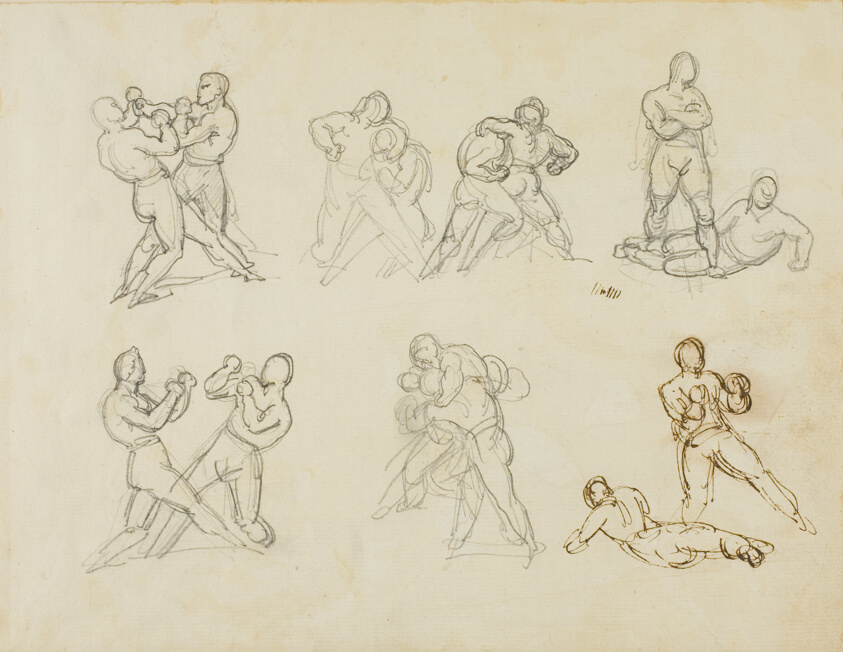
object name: Drawing and Watercolor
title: Seven Sketches of Pairs of Boxers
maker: Jean Louis André Théodore Géricault (French, 1791-1824)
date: 1818/1819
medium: Graphite with pen and brown ink, on cream laid paper, perimeter mounted on cream wove paper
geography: France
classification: graphite; drawings (visual works); prints and drawing